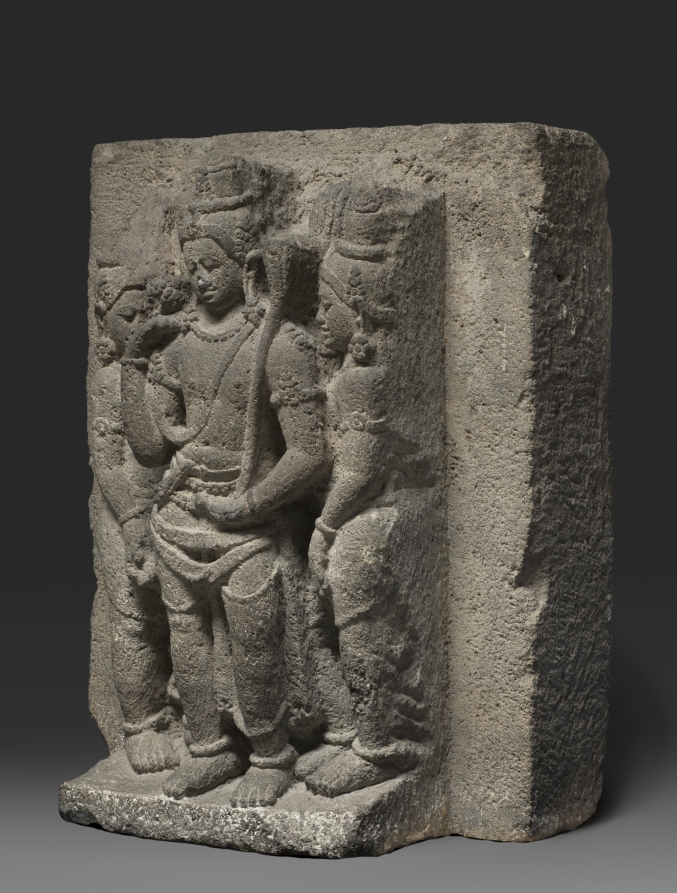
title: Triad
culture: Indonesia, Central Java, Prambanam, Temple of Loro Jonggrang, early 10th Century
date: early 900s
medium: volcanic stone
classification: Sculpture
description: This group has been linked to a temple dedicated to Shiva in Central Java. Its name, Loro Jonggrang, meaning "Slender Maiden," refers to the image of the warrior goddess Durga on the temple, which local legend links to the form of a princess cursed to be turned into stone. The highly porous stone is the distinctive material used to construct temples on the volcanic islands of Indonesia.